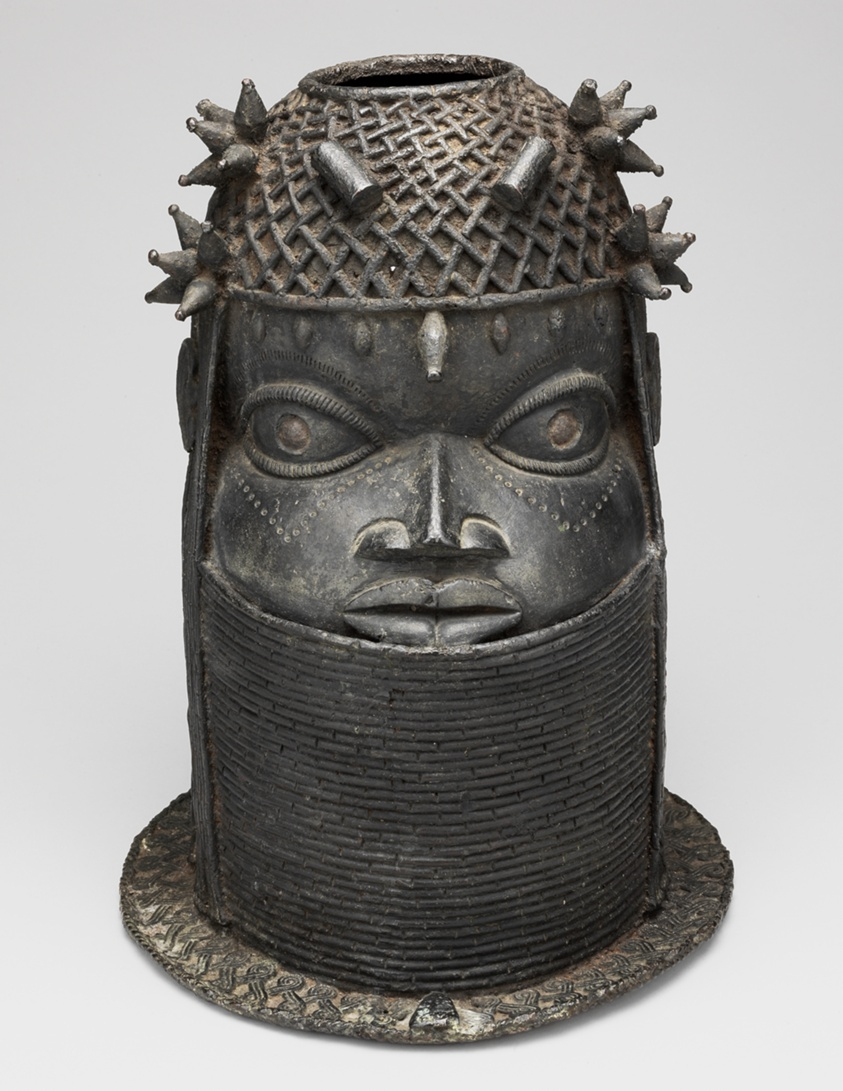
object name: Sculpture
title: Head (Uhunmwun Elao)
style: edo (african), Arts of Africa, Coastal West Africa, benin kingdom, african Art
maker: Edo, Kingdom of Benin; Nigeria; Coastal West Africa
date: 18th/early 19th century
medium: Brass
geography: Nigeria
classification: sculpture; arts of Africa; african art; altar object; ritual objects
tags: ancestors, altar, people, authority, sacred, divine, supernatural